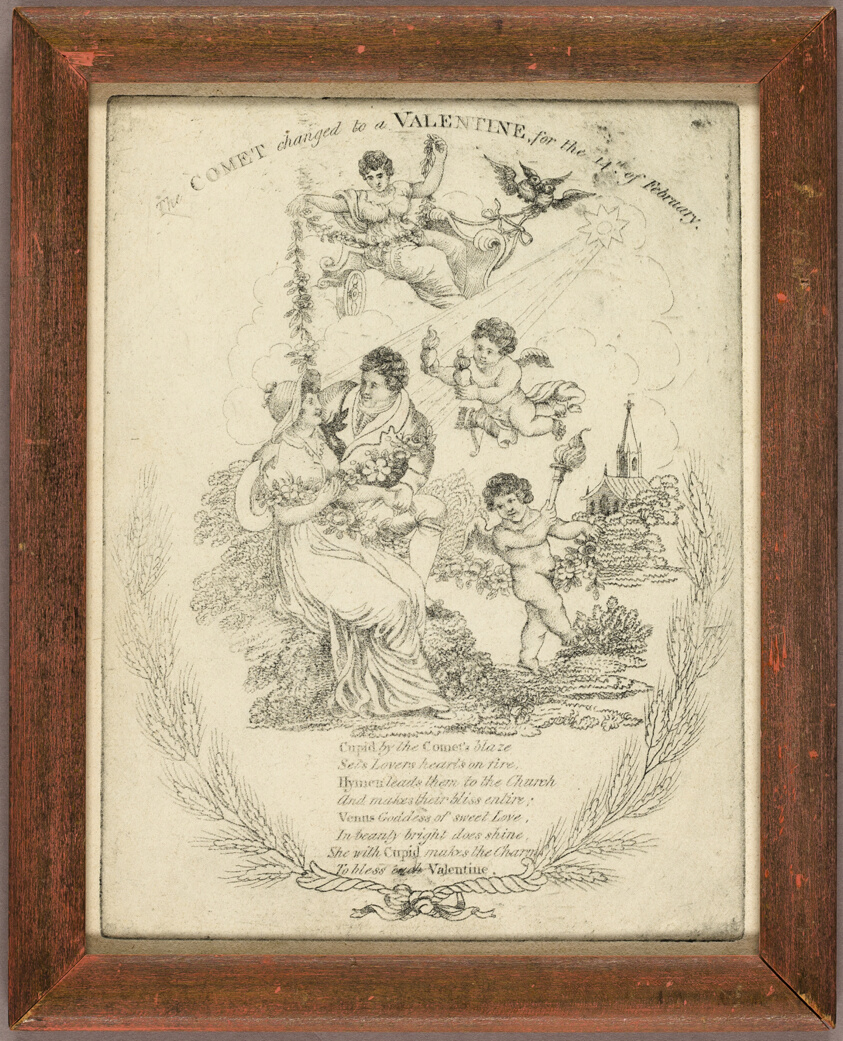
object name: Print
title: The Comet Change to a Valentine for the 14th of February (valentine)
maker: Unknown Artist; English, 19th century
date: c. 1830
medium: Lithograph on ivory paper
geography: England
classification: collage; valentine; prints and drawing; print